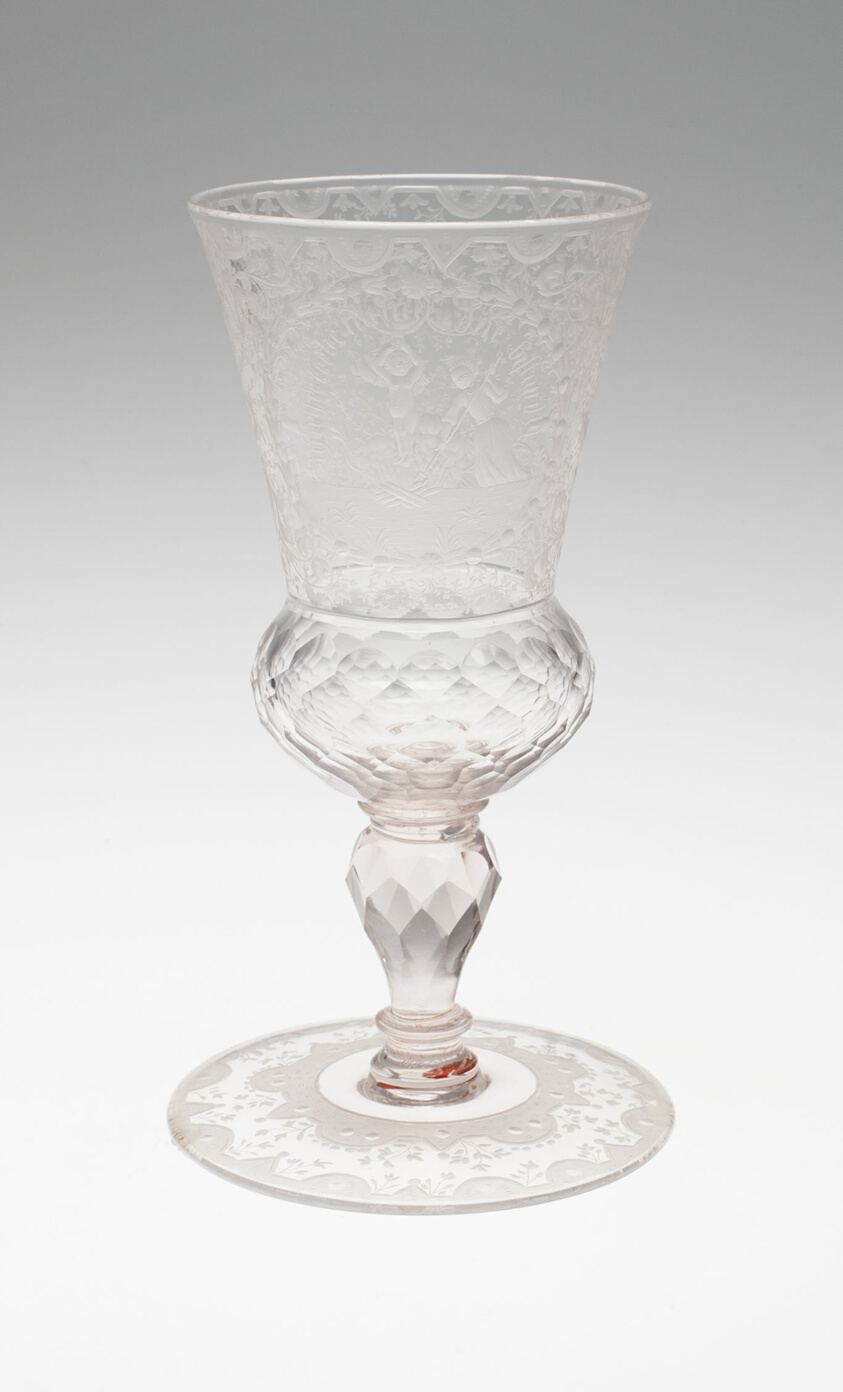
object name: Glass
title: Goblet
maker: Bohemia, Czech Republic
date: c. 1730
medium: Glass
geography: Bohemia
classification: drinking vessel; glass; european decorative arts